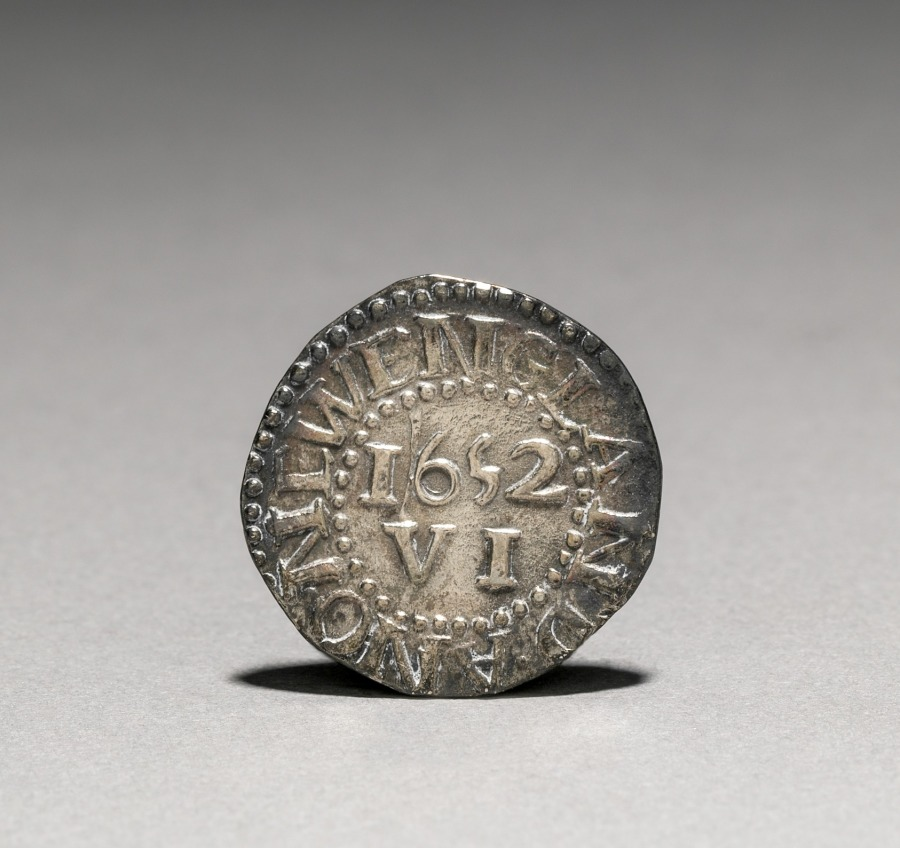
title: Pine Tree Sixpence (reverse)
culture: America, Massachusetts, Boston, 17th century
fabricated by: John Hull (American, 1624–1683)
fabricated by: Robert Sanderson (American, 1609–1693)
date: 1652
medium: silver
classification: Coins